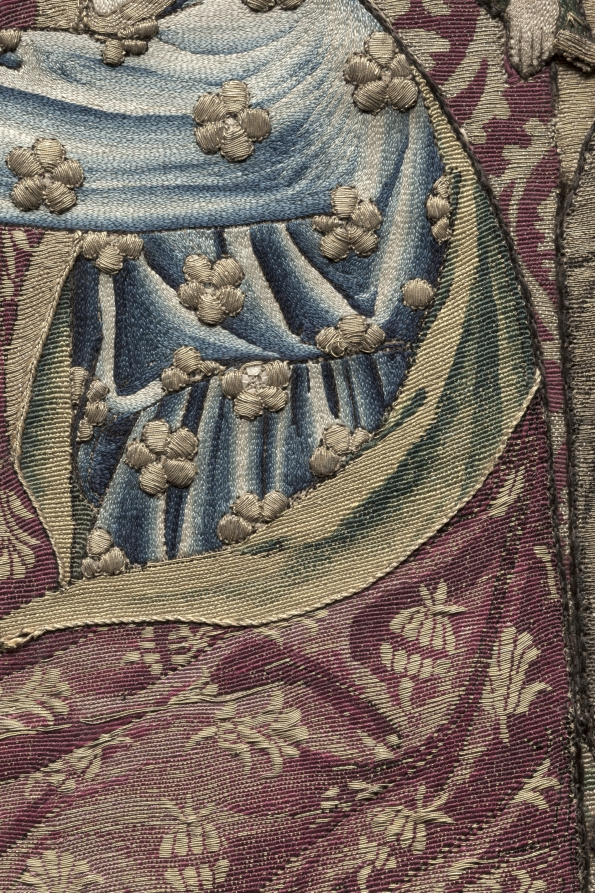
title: Embroidered Tondo from an Altar Frontal: The Coronation of the Virgin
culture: Italy, Florence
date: 1459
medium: Embroidery with gold, silver, and silk thread; split, satin, and couching stitches, or nué (shaded gold)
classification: Embroidery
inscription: the embroidery is backed by an old reused parchment with Latin writing over which in Italian is penned an inscription: "This pallioto was embroidered in the year 1486 by the venerable Margherita del Caccia nun of this monastery. . ." [It is difficult to know to what extent one should rely on this inscription as the style and technique both point clearly to an earlier date.]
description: This masterpiece of Florentine embroidery takes the circular form called a tondo and was likely once attached to an altar frontal. The scene depicts the coronation of the Virgin, the final and culminating event in the narrative cycle of her life. Honoring her as queen of heaven, Christ places the crown on his mother’s head. They are surrounded by eight angels as well as Saints Verdiana and John Gualberto, both much esteemed in Florence, creating a joyous scene. During the Renaissance, Florence emerged as an important center for a specific type of embroidery known as or nué, or shaded gold. This stunning technique used metal and silk threads, as seen here, to create pictures that rivaled paintings. It was frequently used for vestments and altar frontals.